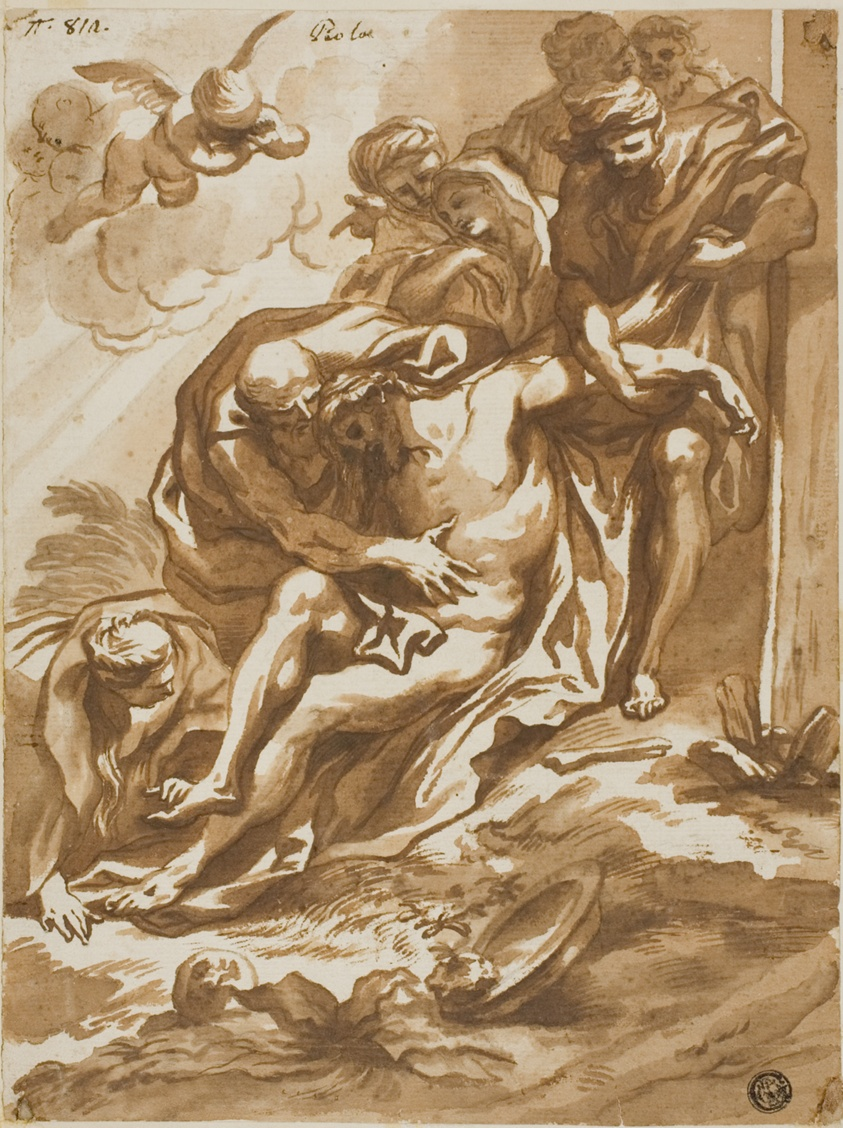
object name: Drawing and Watercolor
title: Descent from the Cross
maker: Domenico Piola (Italian, 1627-1703)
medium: Pen and brown ink and brush and brown wash, over traces of black chalk, on ivory laid paper, laid down on ivory wove card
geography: Italy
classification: drawings (visual works); prints and drawing